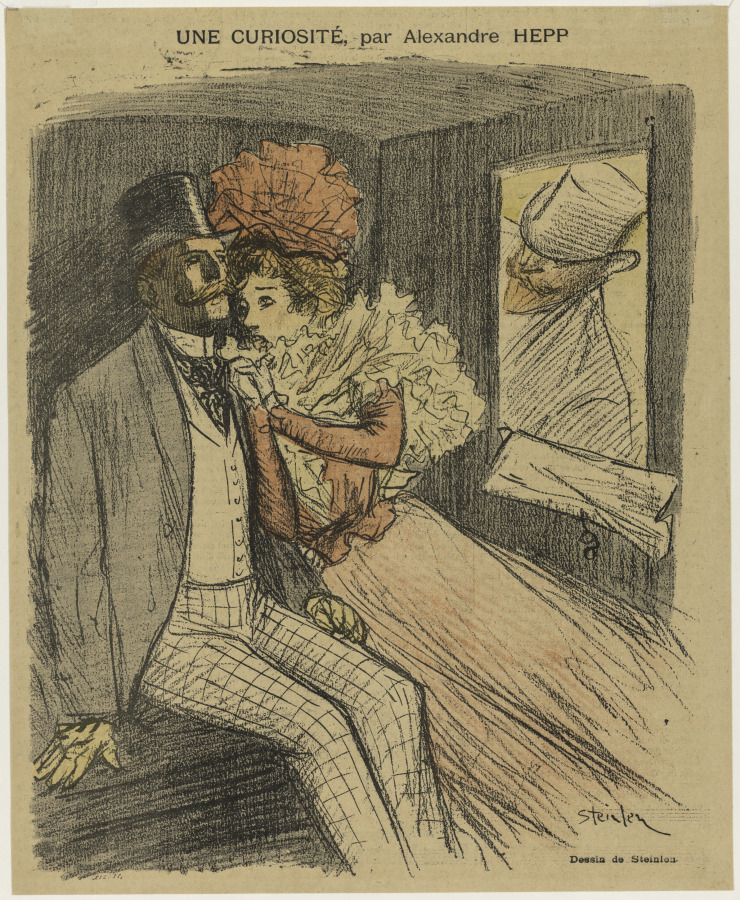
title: Gil Blas Illustré: Une Curiosité, par Alexandre Hepp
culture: Switzerland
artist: Théophile Alexandre Steinlen (Swiss, 1859–1923)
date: 1897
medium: lithograph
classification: Print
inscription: Bottom edge, lower left: zig. Sc, lower right: Steinlen, Dessin de Steinlen. Verso: full page of text